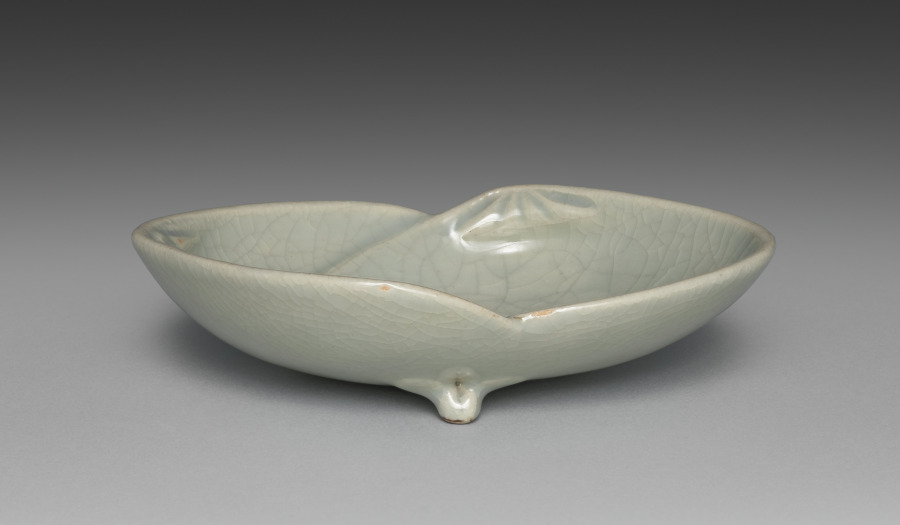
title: Dish from Dishes with Matching Shells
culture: Japan, Meiji period (1868–1912)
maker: Seifū Yohei III (Japanese, 1851–1914)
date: 1893–1914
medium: One of a pair of dishes; porcelain with celadon glaze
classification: Ceramic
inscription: 清風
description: Yohei III’s main output for his sophisticated clientele was in the form of tea sets and dining sets. He created a range of dishes in green glazes. He often produced in pairs, sets of five, or sets of ten. This pair of shell dishes have a box lid interior attestation by Yohei IV that the dishes were made by Yohei III with a cracked-ice (hyōretsu) pattern in the glaze, omitting reference to any glaze coloration.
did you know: These shell-shaped dishes are of the saucer type, suitable for dipping sauces.